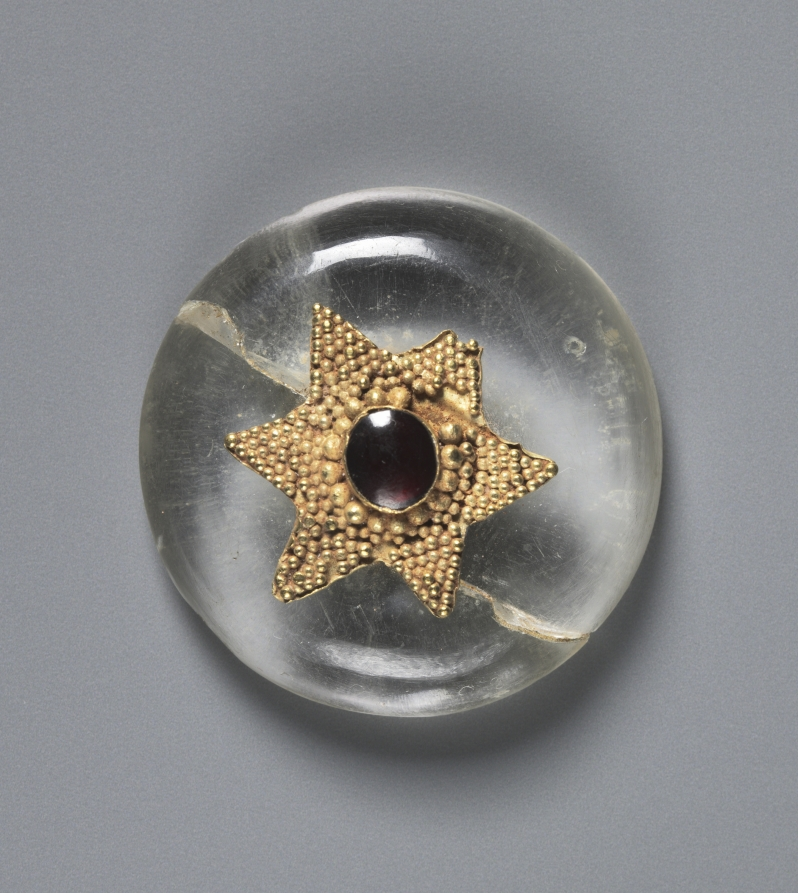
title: Button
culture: Byzantium, early Byzantine period, 6th century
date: 500s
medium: rock crystal with a garnet mounted in a gold granulated star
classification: Jewelry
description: The decorative technique known as granulation had been used in Etruscan, Greek, and Roman jewelry well before this Byzantine piece was made. Granulation is when tiny spheres or “granules” are attached to a piece. It can be seen here in in a rock crystal button decorated with a six-pointed star, with a simply set garnet in the center.